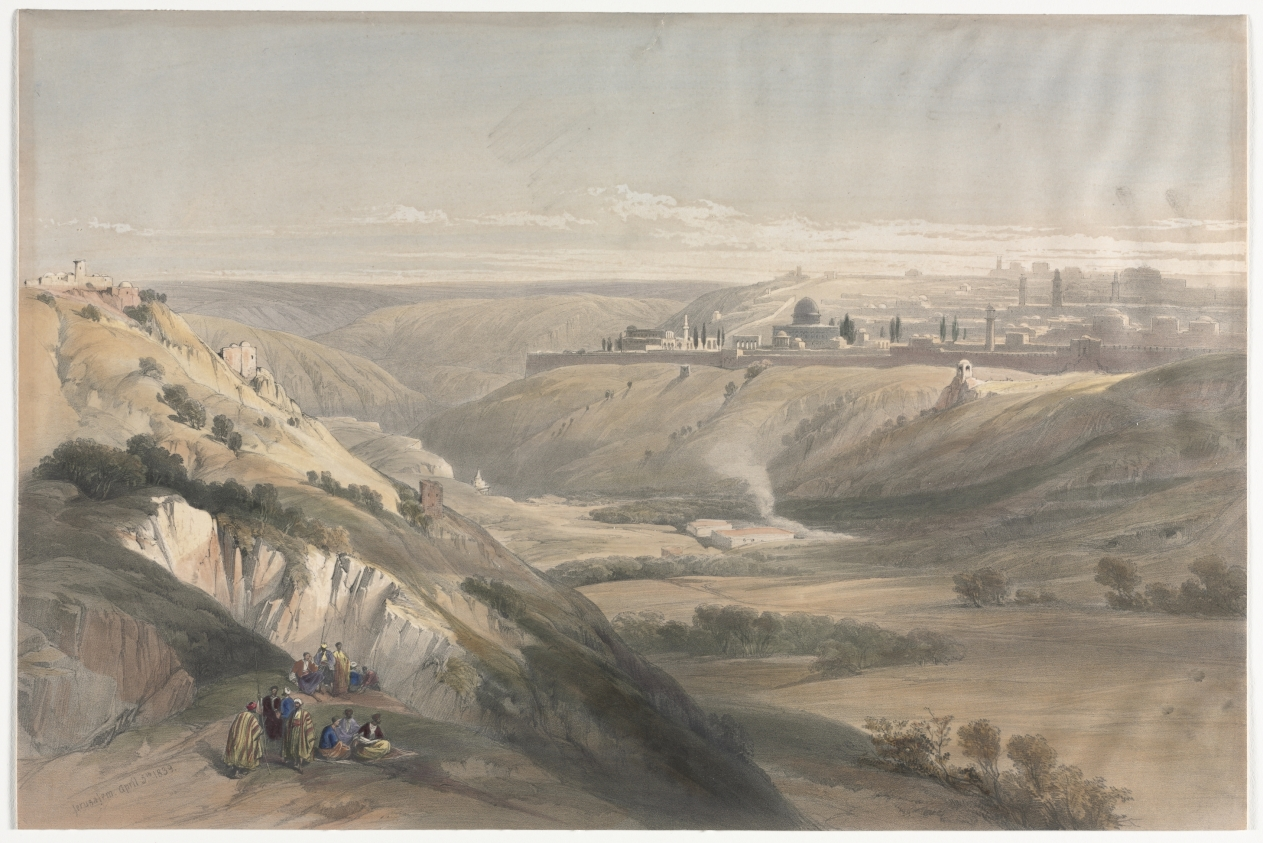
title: Jerusalem from the Mount of Olives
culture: England, 19th century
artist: David Roberts (Scottish, 1796–1864)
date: 1839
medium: color lithograph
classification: Print